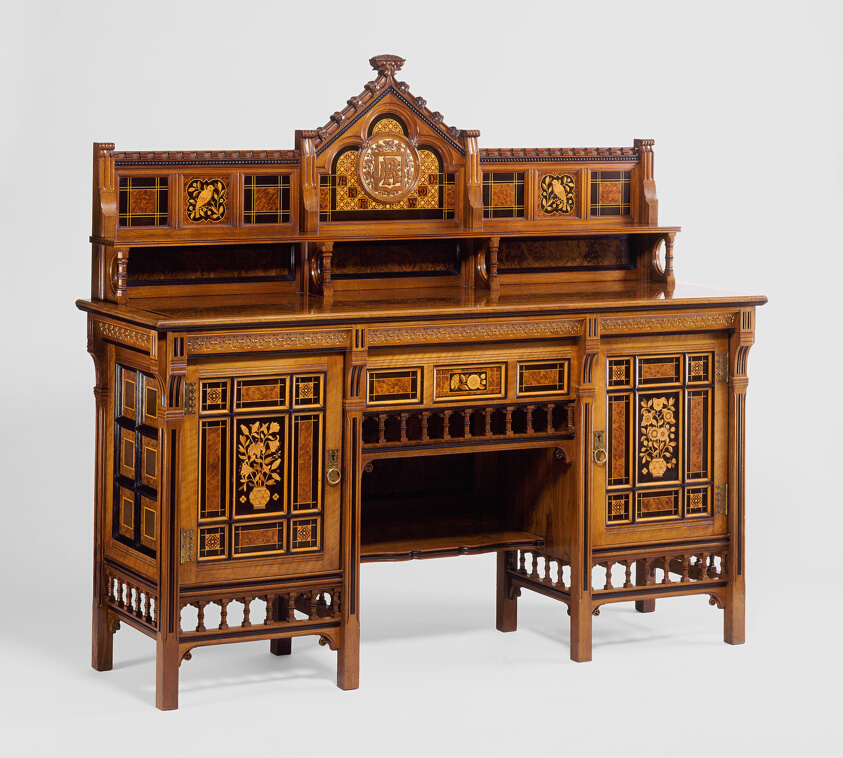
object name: Furniture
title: Drawing Room Cabinet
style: gothic revival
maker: Designed by Bruce James Talbert; Scottish, active in England, 1838–1881; Made by Gillow & Company; England, 1730–1974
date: 1871/72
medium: Walnut, ebony, boxwood, thuya, maple, and other woods, gilding, and lacquered brass mounts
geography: Lancaster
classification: case furniture; furniture; european decorative arts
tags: furniture